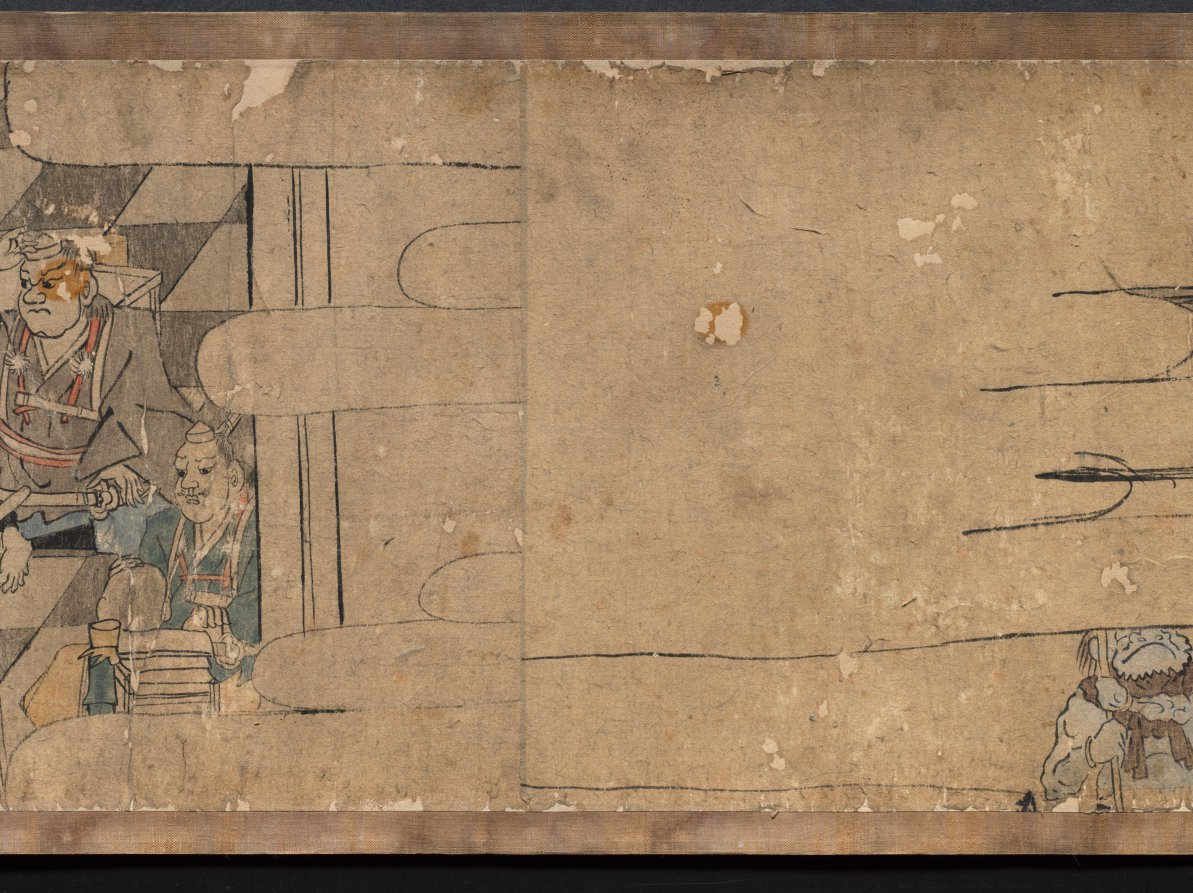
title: Oeyama Engi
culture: Japan, Edo period (1615–1868)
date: 1615–1868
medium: one of a pair of handscrolls; ink and color on paper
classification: Painting